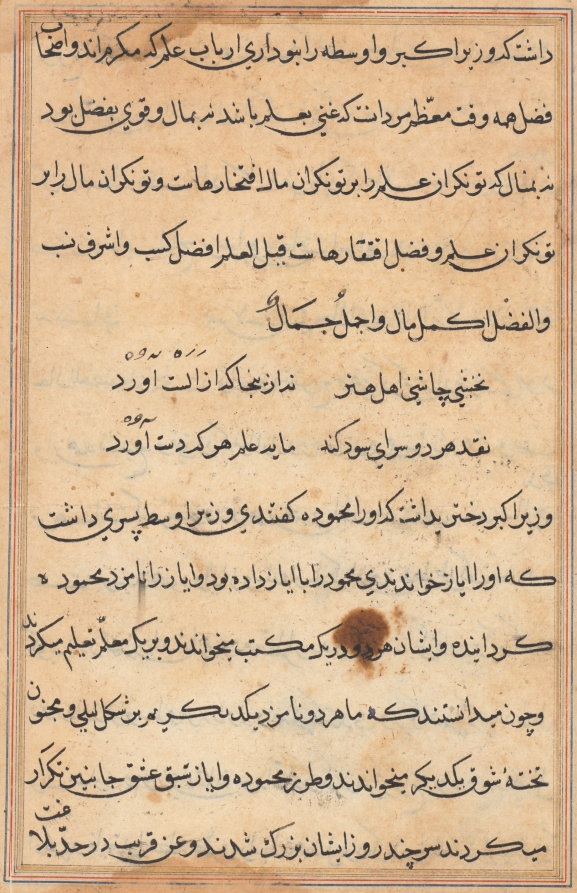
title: Page from Tales of a Parrot (Tuti-nama): text page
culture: Mughal India, court of Akbar (reigned 1556–1605)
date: c. 1560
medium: gum tempera, ink, and gold on paper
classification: Painting